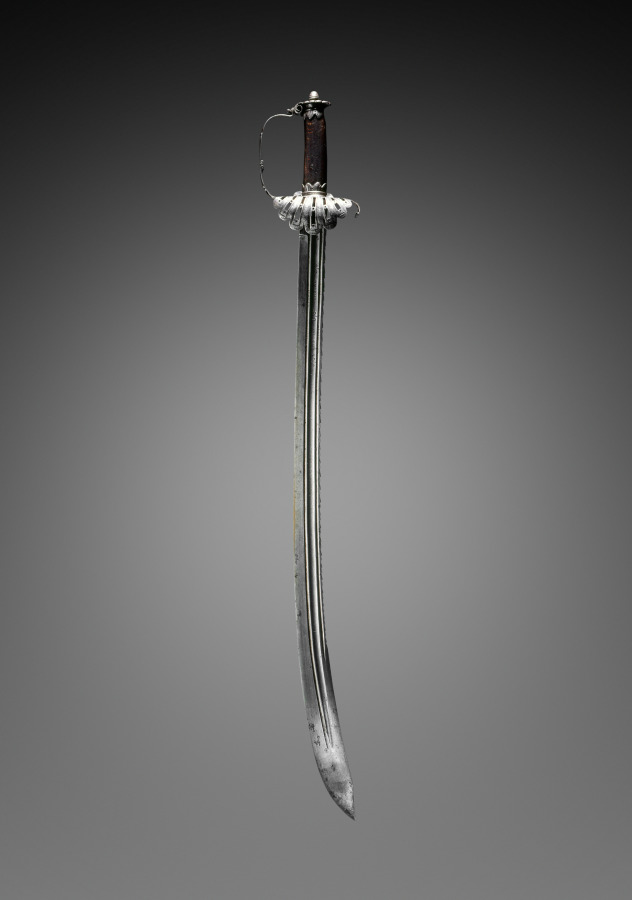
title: Hunting Sword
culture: Germany, Solingen, 17th century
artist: Clemens Willems (German)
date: c. 1630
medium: steel and wood, scroll ornaments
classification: Arms and Armor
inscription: inscribed on blade: CLEMENS WILLEMS/ FECIT SOLINGEN